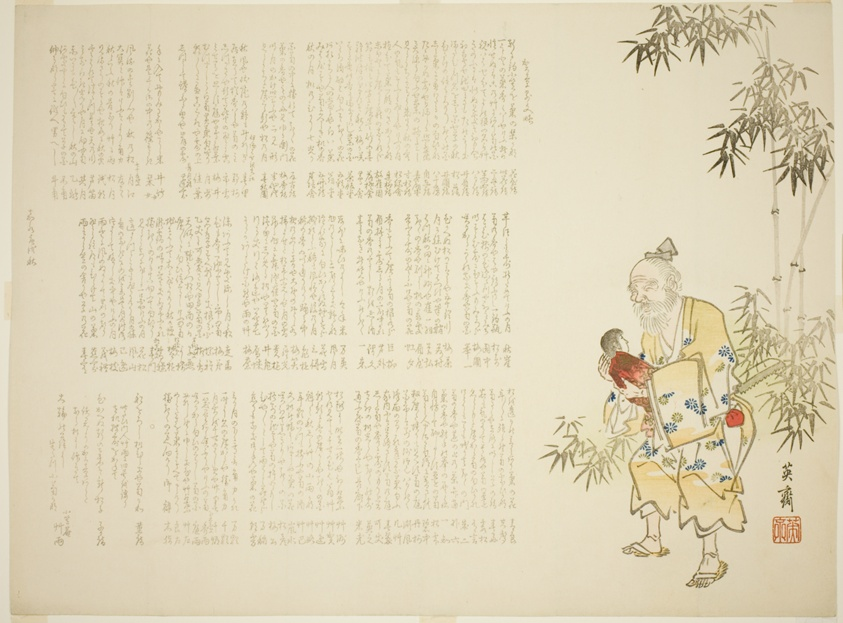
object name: Print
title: The Bamboo Cutter and the Moonchild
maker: Eisai (Japanese, mid-19th century)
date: 1850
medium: Color woodblock print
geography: Japan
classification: print; asian art